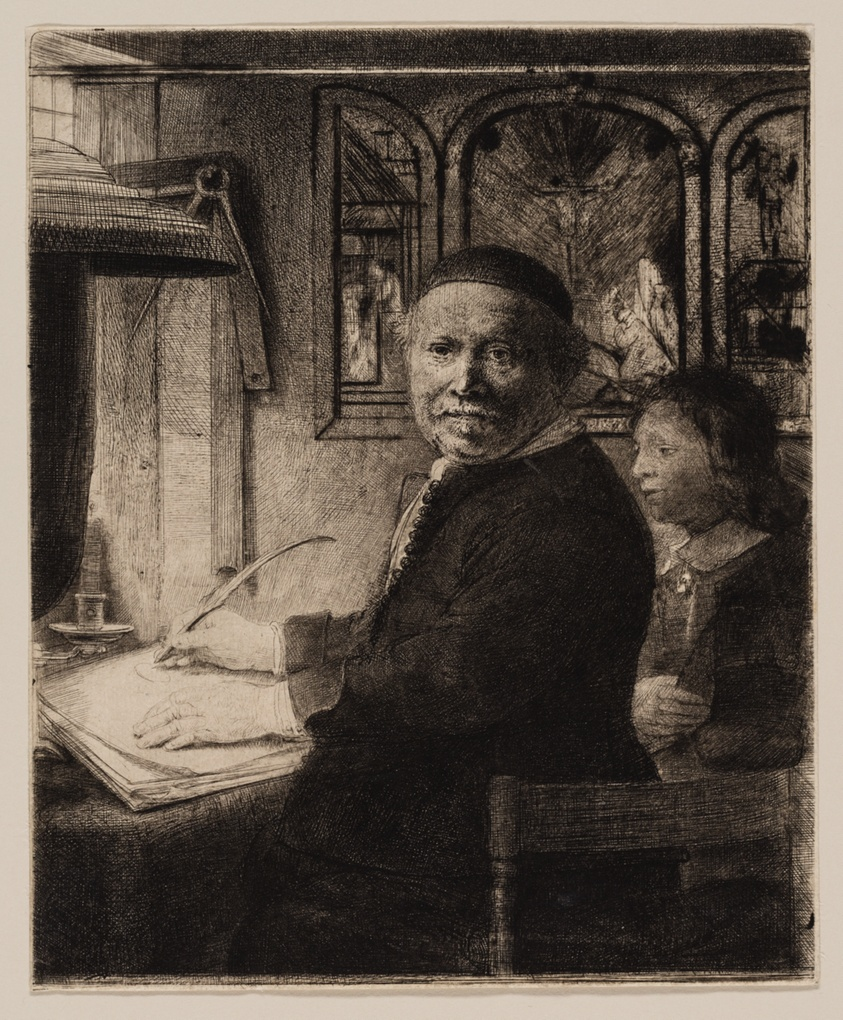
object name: Print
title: Lieven Willemsz van Coppenol, Writing Master: The Smaller Plate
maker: Rembrandt van Rijn (Dutch, 1606-1669)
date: c. 1658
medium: Etching, drypoint, and burin in black on buff laid paper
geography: Holland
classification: etching; print; prints and drawing; paper; drypoint; burin